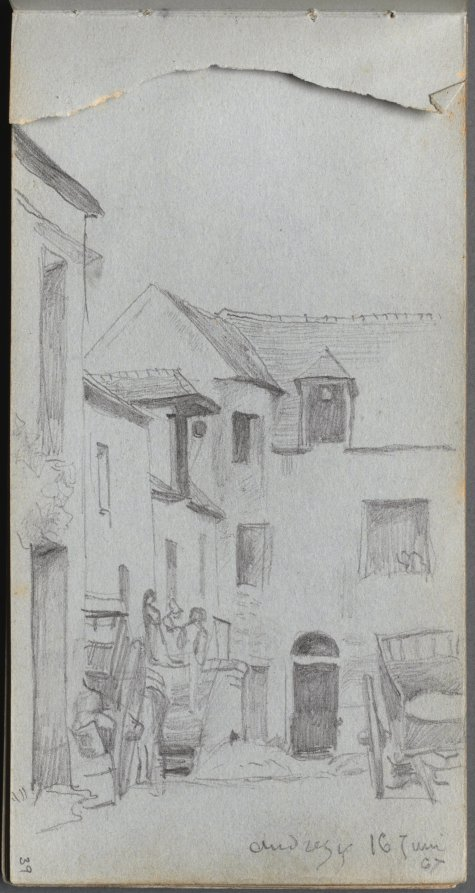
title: Sketchbook, page 39: Street Scene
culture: France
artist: Ernest Meissonier (French, 1815–1891)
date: c. 1860s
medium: graphite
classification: Bound Volume